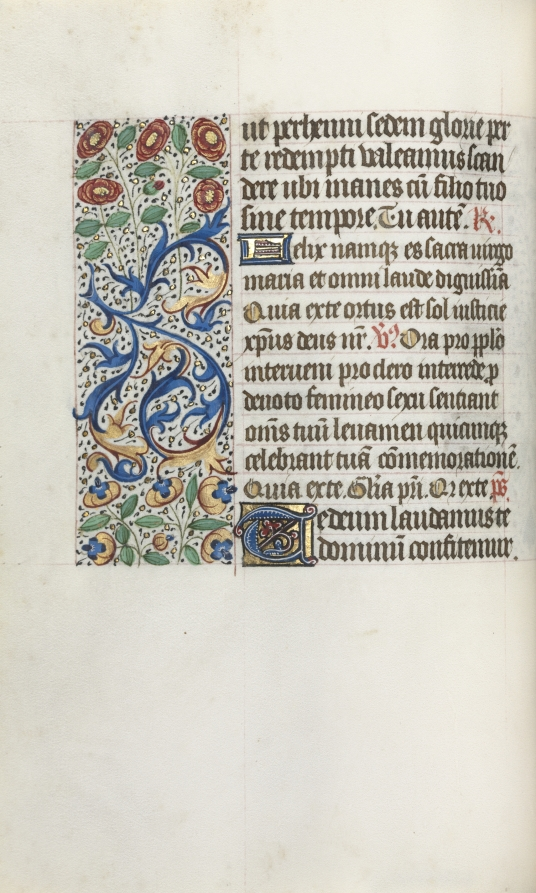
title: Book of Hours (Use of Rouen): fol. 36v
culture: France, Rouen, 15th century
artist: Master of the Geneva Latini (French, active Rouen, 1460–80)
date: c. 1470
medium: ink, tempera, and gold on vellum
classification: Bound Volume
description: In the late 1400s and early 1500s Rouen was an established and important center of book production. The city’s cathedral had a wealthy chapter that spent large sums of money to commission books and to maintain its extensive library. The stationers and booksellers would have likely been concentrated in or near the cathedral precinct. This artist, named after a manuscript now in Geneva, was Rouen’s principal illuminator during the second half of the 1400s.